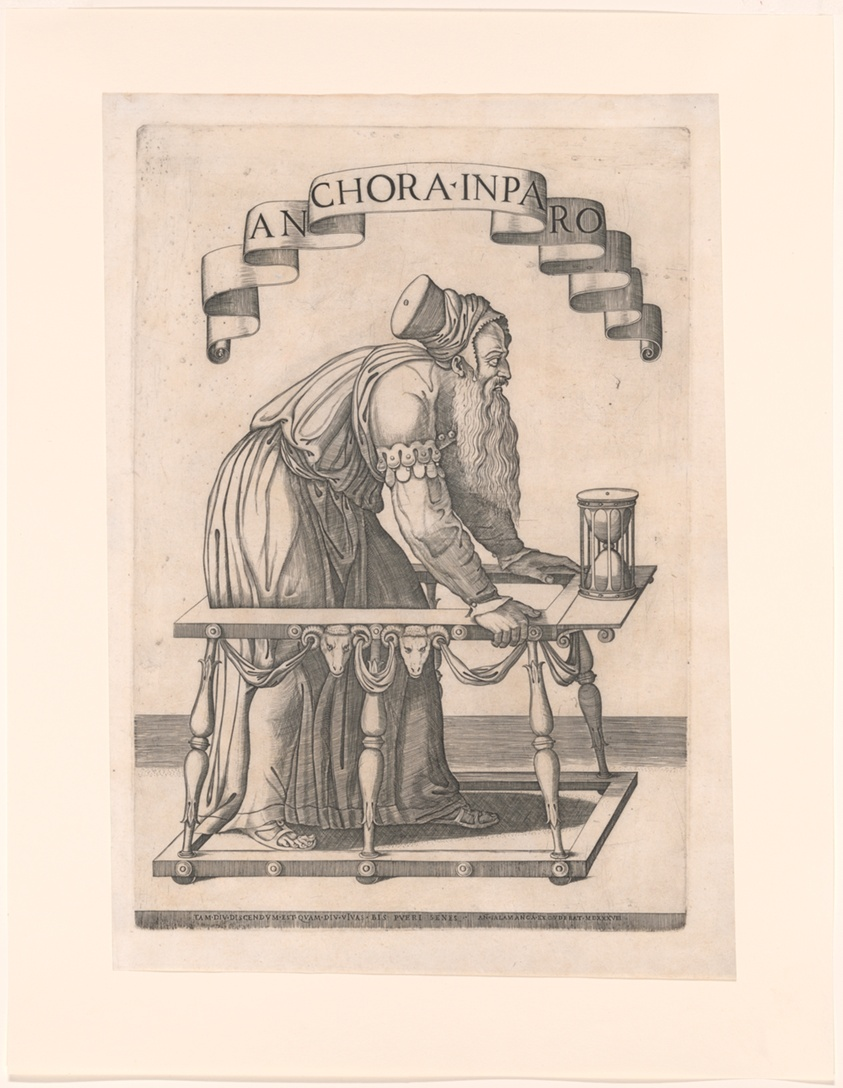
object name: Print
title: Anchora Inparo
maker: Attributed to Girolamo Faccioli (Italian, active by 1527/30–died 1574); after Domenico Giunti (Italian, 1505-1560)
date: 1538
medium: Engraving in black on ivory laid paper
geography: Italy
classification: prints and drawing; paper; engraving; print